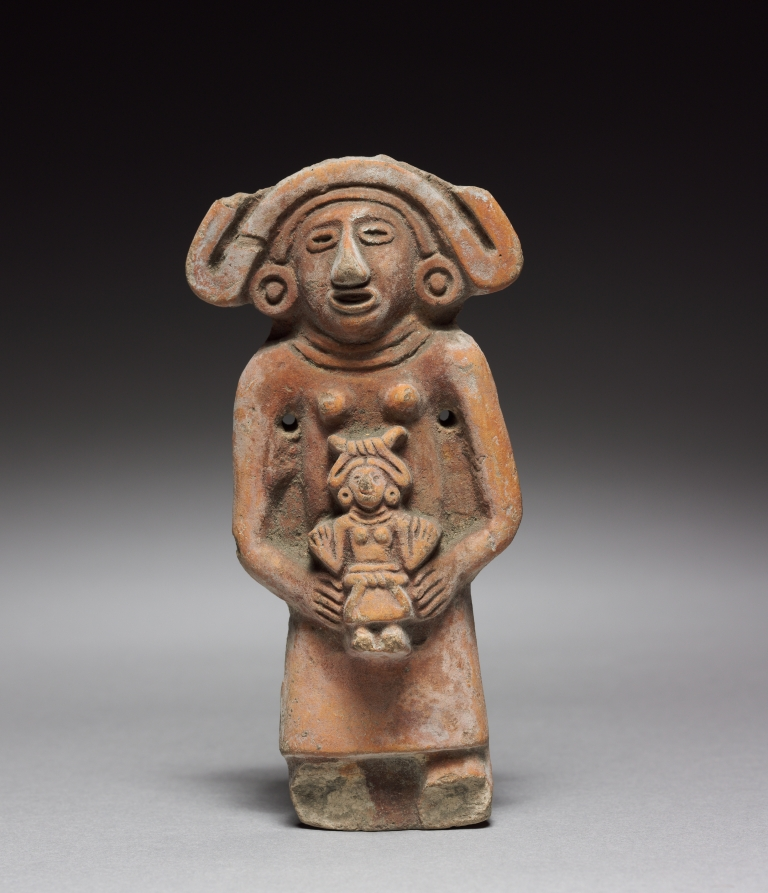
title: Mother-and-Child Figurine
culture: Mexico, Aztec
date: 1325–1521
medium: Ceramic, pigment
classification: Ceramic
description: The hair of this hollow, mold-made, female figurine was originally arranged in two projections atop the head. She carries an identical, small figure interpreted as a child; the figurine may be a metaphor for generational continuity.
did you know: This mother-and-child figurine may be a metaphor for generational continuity.